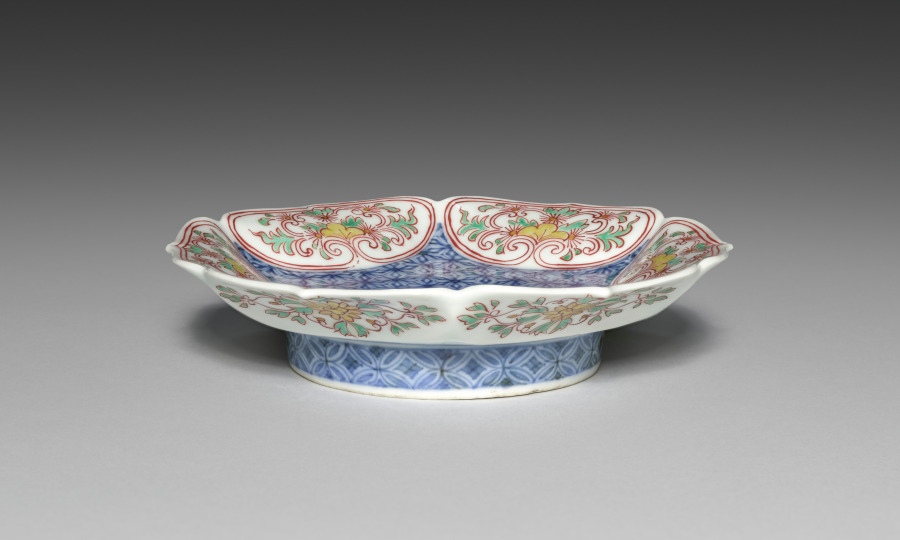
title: Small Dish (Kozara) with Hemp-Leaf Pattern and Bellflower Rim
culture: Japan, Edo period (1615–1868)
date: c. 1670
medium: Porcelain with underglaze blue and color enamel (Hizen ware, Nabeshima type)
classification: Ceramic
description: This dish combines underglaze blue decoration with overglaze color enamels. In between is a transparent glaze.